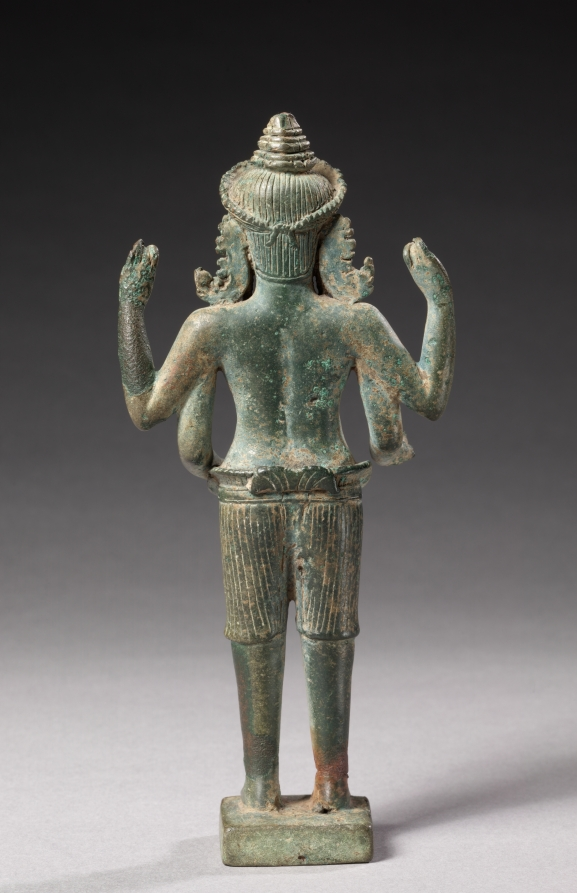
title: Standing Ashura with Four Arms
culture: Cambodia, Koh Ker style, 2nd quarter of 10th Century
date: 925–950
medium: bronze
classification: Sculpture